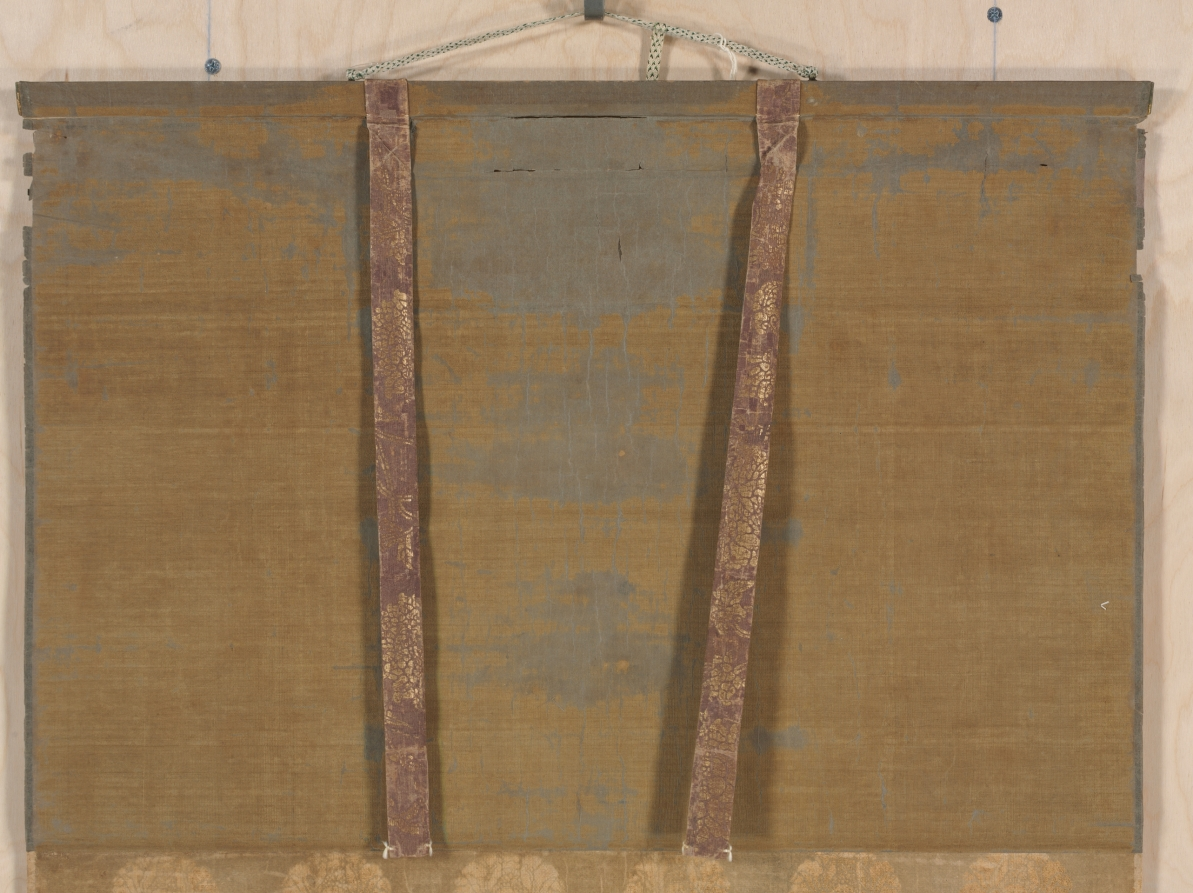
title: The Second Coming of the Fifth Patriarch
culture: China, Yuan dynasty (1271-1368)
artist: Yintuoluo (Chinese, c. 1285-c. 1355)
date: c. mid-1300s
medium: section of a handscroll mounted as a hanging scroll, ink on paper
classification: Painting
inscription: [印] 人言洞裡桃花源，未必人間有此枝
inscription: 此子無爺只有娘，禪師莫問幾時生。 青松未老黃梅飄，兩世都如夢一場。 [印] 楚石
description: A small boy, accompanied by his mother, is closing his hands in greeting to an old monk who has a young attendant standing behind him. Scholars believe the scene is a meeting between the fourth patriarch of Chan Buddhism, Daoxin 道信, and the little boy, who was the reincarnation of an old monk named Zaisong daozhe 栽松道者 (Pine Planter). They had encountered before, during which Daoxin advised the Pine Planter to endure a reincarnation as he was too old to reach enlightenment. This painting is done by Yintuoluo, an artist renowned for his simple and unadorned style.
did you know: This painting is just a section of a handscroll that has been remounted as a hanging scroll.